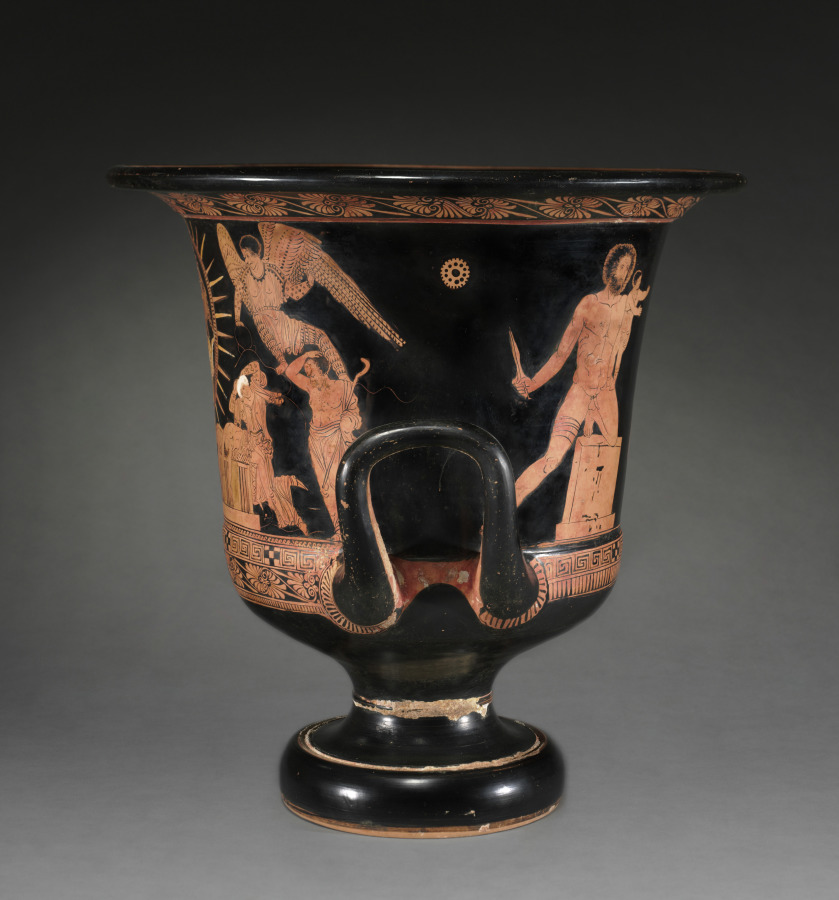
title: Red-Figure Calyx-Krater (Mixing Vessel): Medea in Chariot (A); Telephos with Baby Orestes (B)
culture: South Italian, Lucanian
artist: near the Policoro Painter (South Italian, Lucanian, active c. 400 BCE)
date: c. 400 BCE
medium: ceramic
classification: Ceramic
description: The remarkable scene on the front of this vase relates to the famous tragedy Medea, written by Euripides and first produced in Athens in 431 BC. Framed in the center by a halo (recalling her sun god grandfather Helios), the sorceress Medea flies off in a dragon-drawn chariot. Seeking revenge against her husband Jason, leader of the Argonauts, Medea has just slain their two children. Two Furies flank her, while Jason and a distraught nurse and teacher approach the bodies on the altar below. A different tragedy unfolds on the other side of the vase, from Euripides’s Telephos (438 BC). The wounded warrior Telephos holds the baby Orestes hostage at an altar, with Agamemnon and Clytemnestra rushing to save their son.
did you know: This vase includes scenes connected to two Athenian tragedies dealing with children—Medea and Telephos.